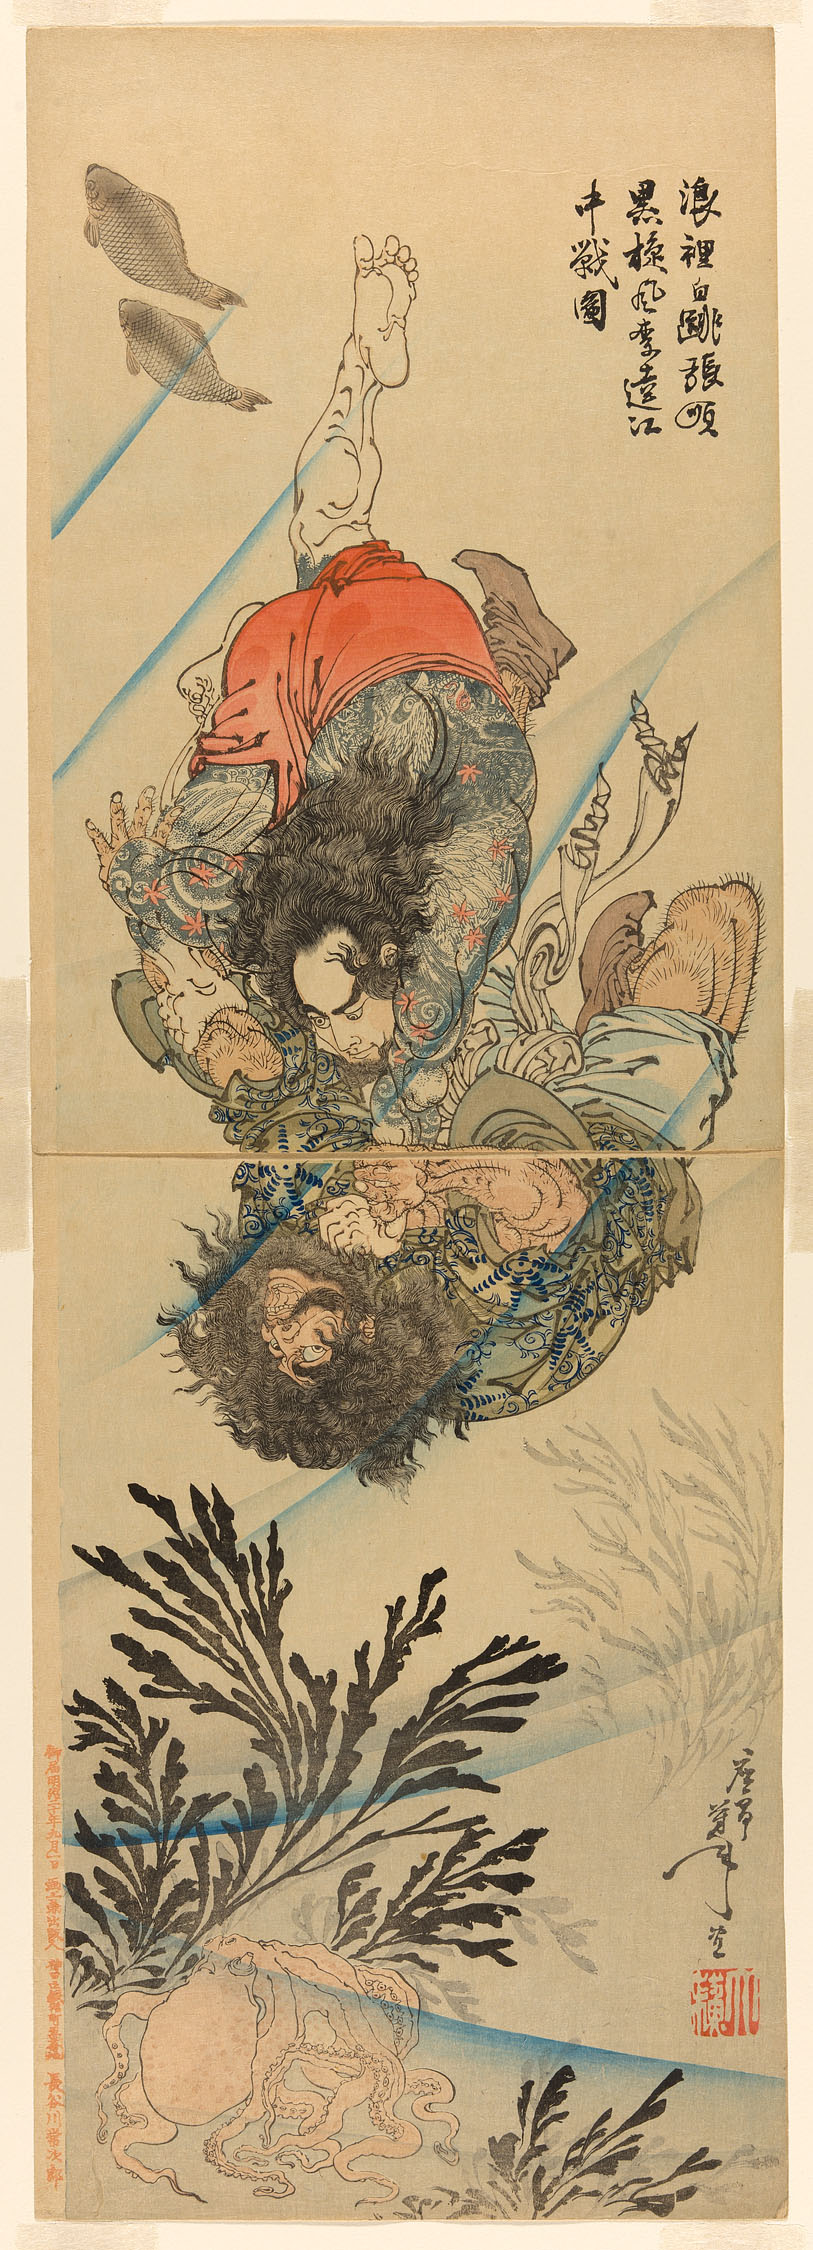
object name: Print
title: Zhang Shun, the White Splash in the Waves, and Li Kui, the Black Whirlwind, in an Underwater Struggle (Rori Hakucho Chojun and Kokusenpu Riki)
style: Japanese (culture or style)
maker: Tsukioka Yoshitoshi (Japanese, 1839–1892)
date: September 1887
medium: Color woodblock prints; oban diptych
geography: Japan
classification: woodblock print; print; asian art